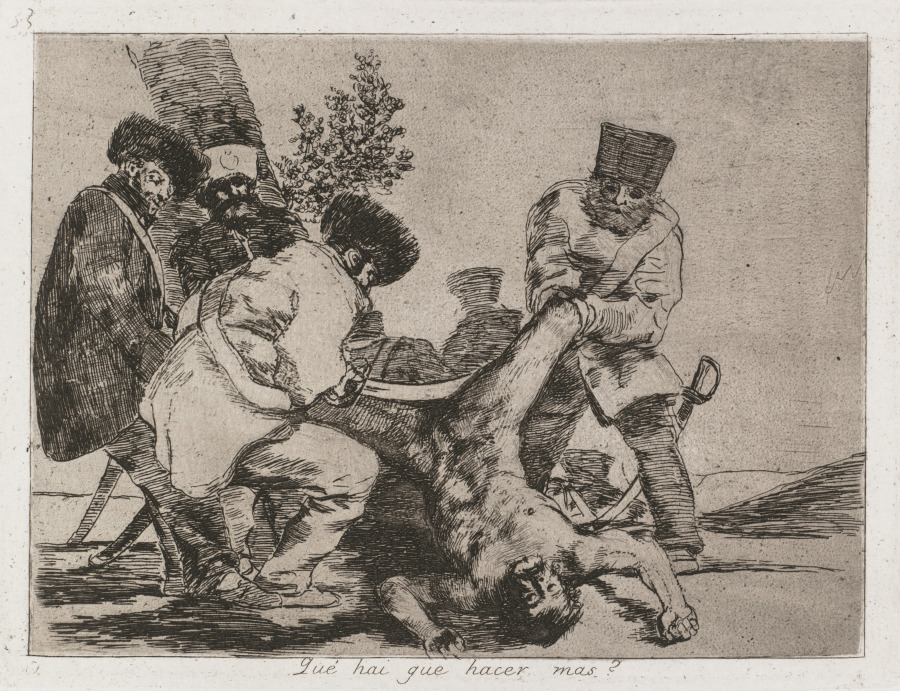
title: Disasters of War: Pl. 33, What more can one do?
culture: Spain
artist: Francisco de Goya (Spanish, 1746–1828)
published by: Real Academia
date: 1810–1813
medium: Etching and aquatint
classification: Print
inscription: Lower right, in graphite: 01658G00002; In plate, below image, center: Qué hai gue hacer mas?.; in plate, above image, upper left: 33; verso: lower right corner, in graphite: G-54 (upside down)